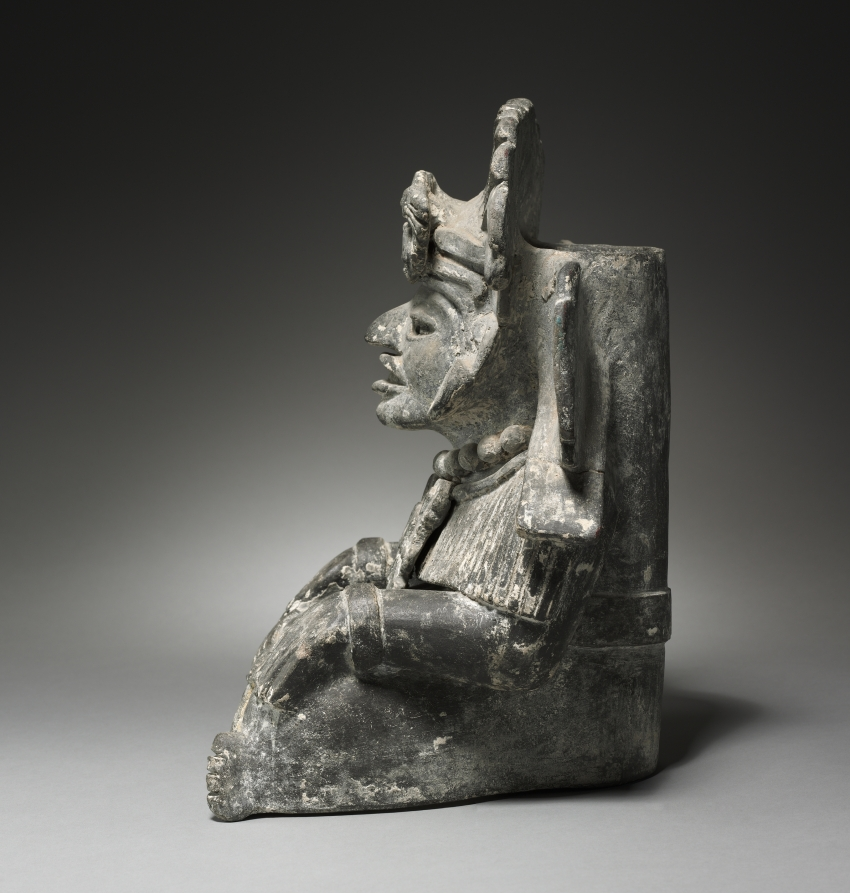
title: Effigy Urn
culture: Mexico, Zapotec, Monte Albán IIIB style, 20th century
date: 1900s (Thermoluminescence date, after 1930)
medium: gray pottery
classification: Sculpture